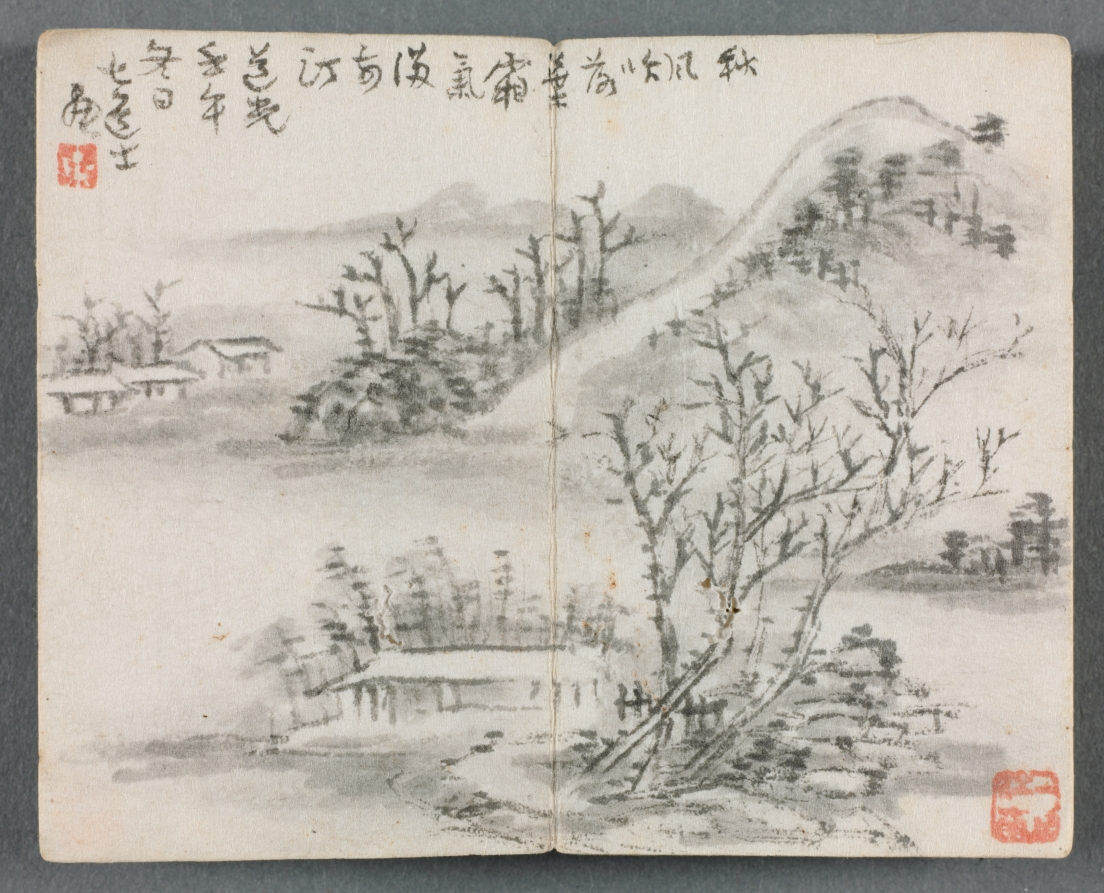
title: Miniature Album with Figures and Landscape (Landscape with Hill)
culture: China, Qing dynasty (1644–1911), Qianlong reign (1736–95)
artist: Zeng Yandong (Chinese, c. 1751–1827)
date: 1822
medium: album leaf, ink and color on paper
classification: Painting